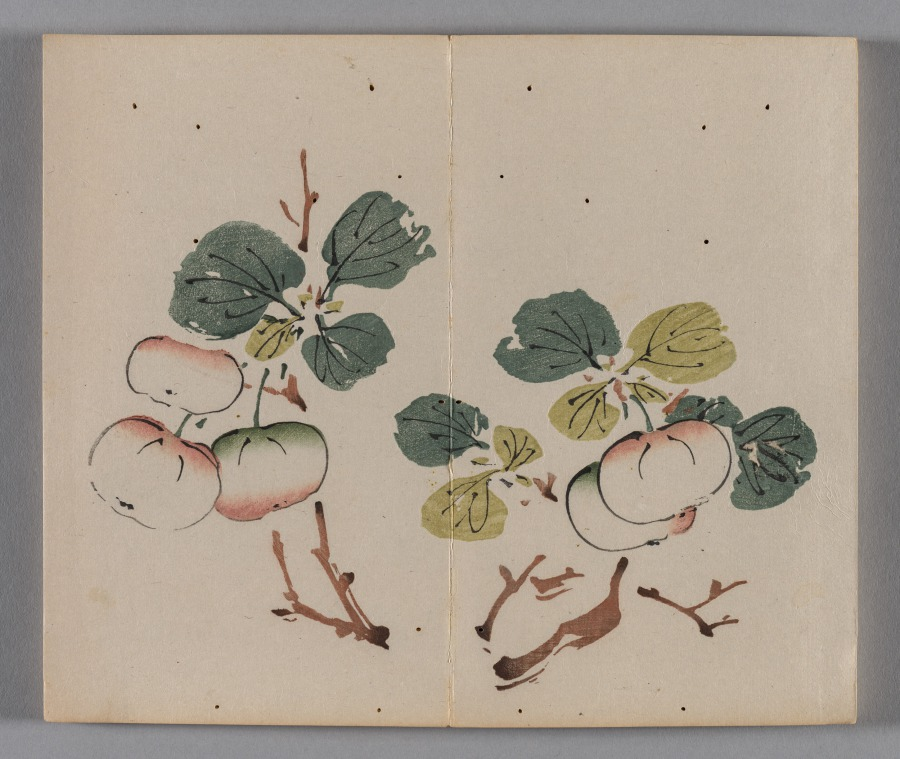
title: Ten Bamboo Studio Painting and Calligraphy Handbook (Shizhuzhai shuhua pu): Fruit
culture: China, Qing dynasty (1644-1911)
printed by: Hu Zhengyan (Chinese, c. 1584–1674)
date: 1633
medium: Woodblock-printed book; ink and colors on paper; first edition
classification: Print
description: Color printing reached a level of perfection in the early 1600s, as seen in this Ten Bamboo Studio Collection of Calligraphy and Painting and the Mustard Seed Garden Manual of Painting (printed 1679 and 1701). The painterly quality, precision in registering (aligning) the woodblocks, and harmonious colors made them the most successful color print editions in Chinese history. Both editions were printed and compiled in Nanjing, spread nationwide, and had a great impact on the arts in Japan and Korea.